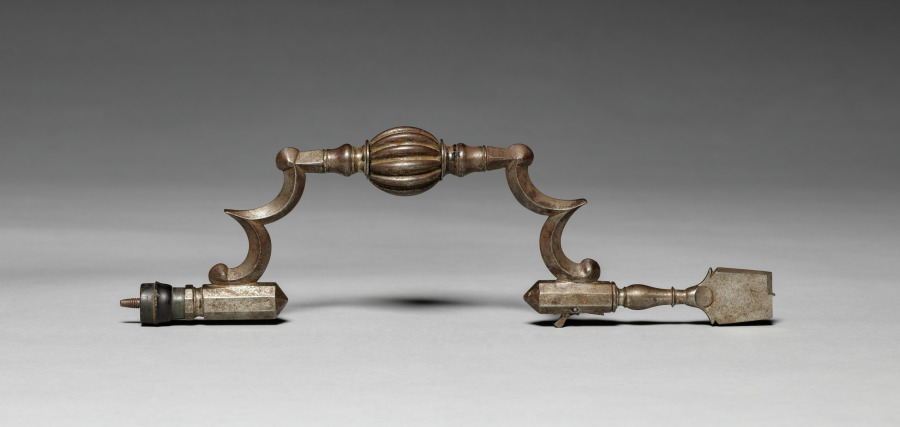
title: Brace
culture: Europe, 17th-18th century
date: 1600s–1700s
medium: metal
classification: Tool